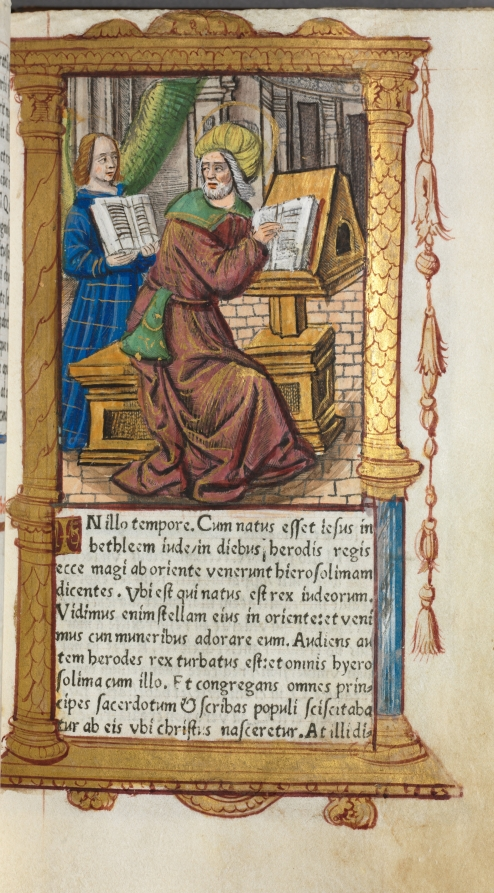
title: Printed Book of Hours (Use of Rome): fol. 19r, St. Matthew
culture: France, Paris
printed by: Guillaume Le Rouge (French, Paris, active 1493–1517)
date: 1510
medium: 112 Printed folios on parchment, bound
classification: Bound Volume